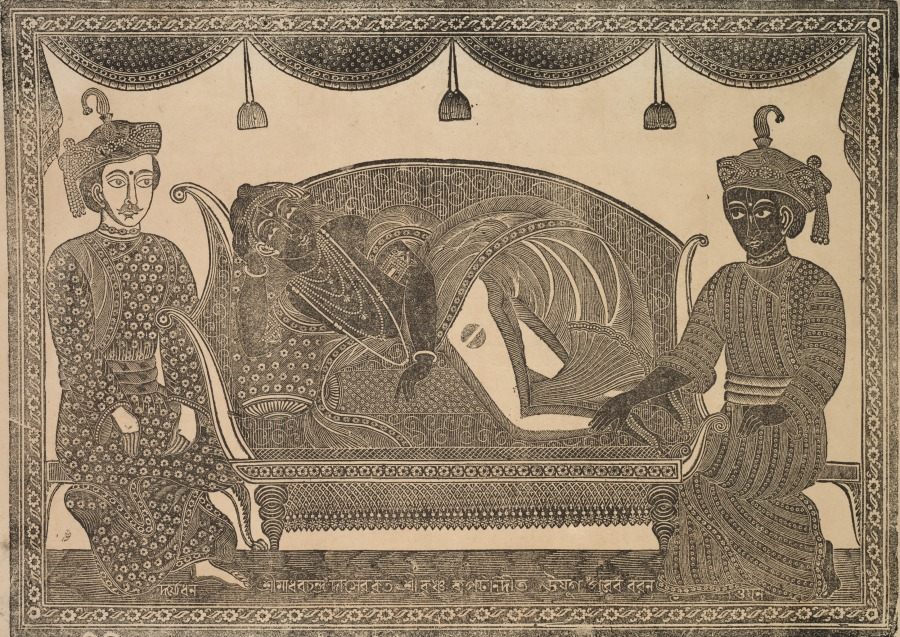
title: Kalighat Painting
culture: Eastern India, Bengal, Kolkata, Kalighat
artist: Shri Gobinda Chandra Roy (Indian, active late 1800s)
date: c. 1890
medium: woodcut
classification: Print